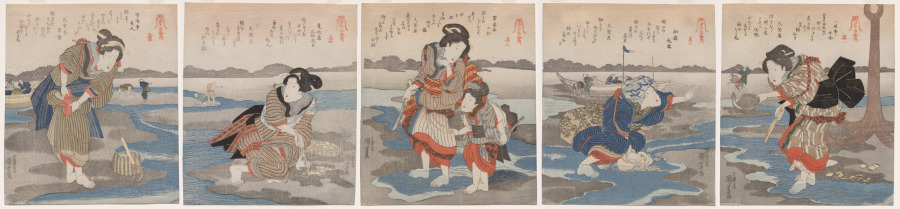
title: A Low Tide Pentaptych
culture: Japan, Edo period (1615–1868)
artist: Utagawa Kuniyoshi (Japanese, 1797–1861)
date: c. 1830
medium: Pentaptych of color woodblock prints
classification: Print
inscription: Signature: Ichiyusai Kuniyoshi ga.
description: Five surimono 刷物, privately commissioned prints known literally as "printed things," make up this image of women collecting sea life at low tide. Ten poems written by members of a poetry salon appear across the upper part of the composition. All but one contain the words "low tide," with the remaining poem describing abalone as a sought-after jewel.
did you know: A pentaptych is a composition of five parts.